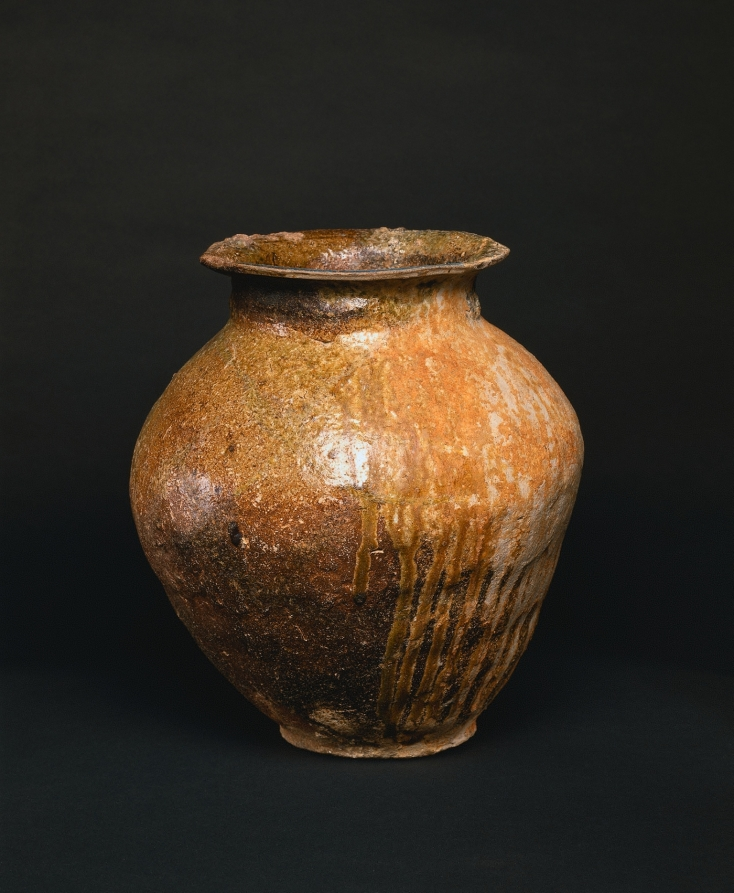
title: Storage Vessel: Tokoname Ware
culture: Japan, Heian period (794–1185)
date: 1100s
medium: stoneware with natural ash glaze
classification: Ceramic